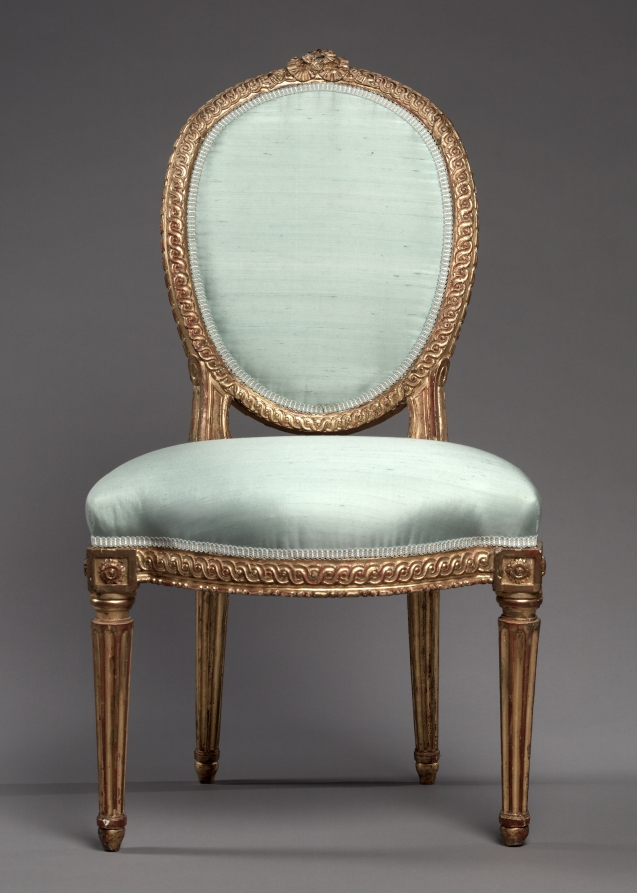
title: Side Chair (2 of 2)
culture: France, style of Louis XVI, 18th century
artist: Jean Baptiste fils Lelarge (French, 1743–1802)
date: 1700s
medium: gilded wood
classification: Furniture and woodwork